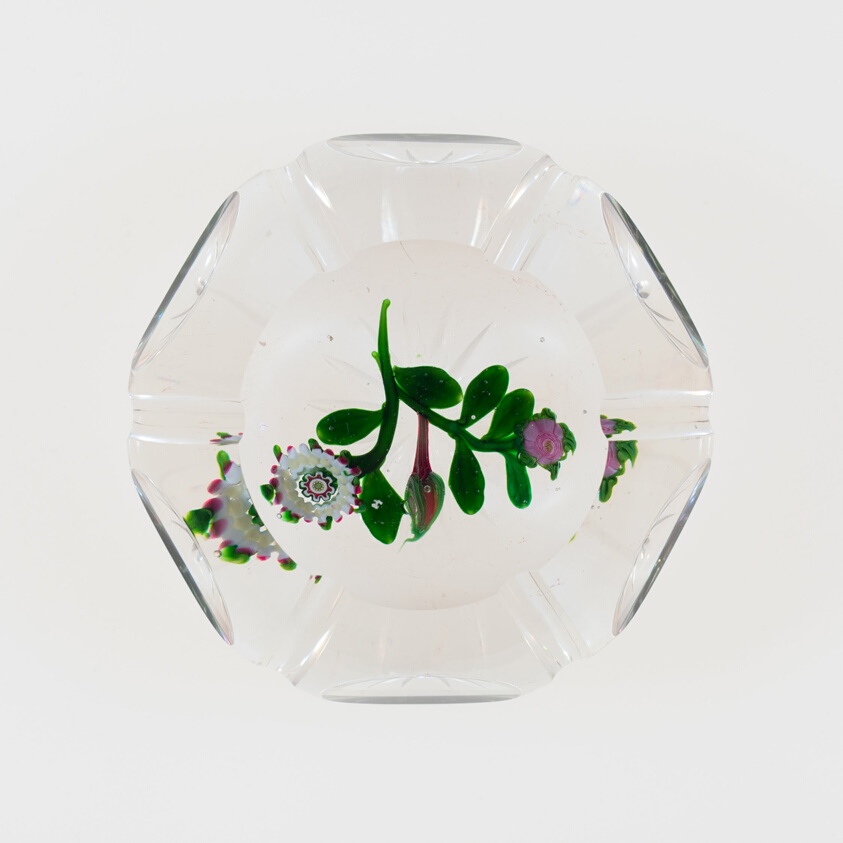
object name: Glass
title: Paperweight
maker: Clichy Glassworks (Cristalleries de Clichy); Clichy, France, 1837-1885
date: c. 1848–55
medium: Glass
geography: Clichy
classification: paperweight; lampwork; european decorative arts; glass